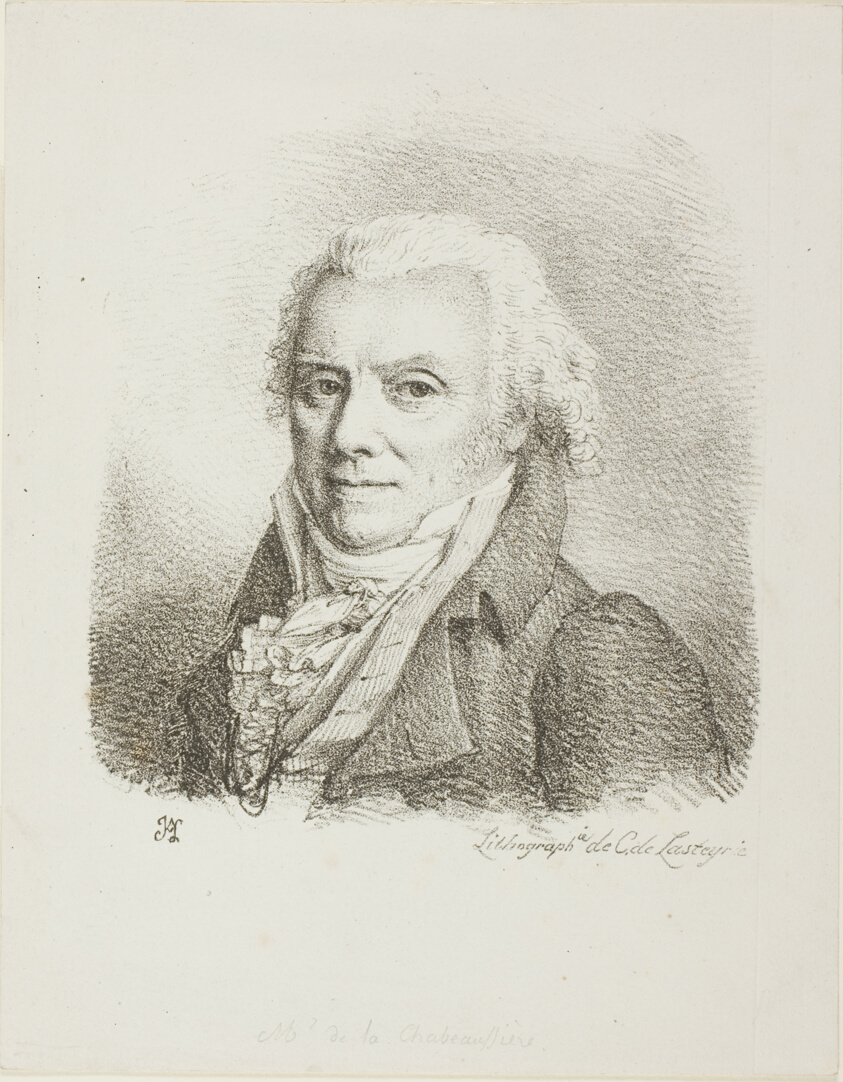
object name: Print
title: Self-Portrait in a Dark Cloth Coat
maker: Jean Antoine Laurent (French, 1763-1832); printed by Comte de Charles Philibert Lasteyrie du Saillant (French, 1759-1849)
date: c. 1817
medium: Lithograph in black on ivory wove paper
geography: France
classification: lithograph; print; prints and drawing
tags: portraits